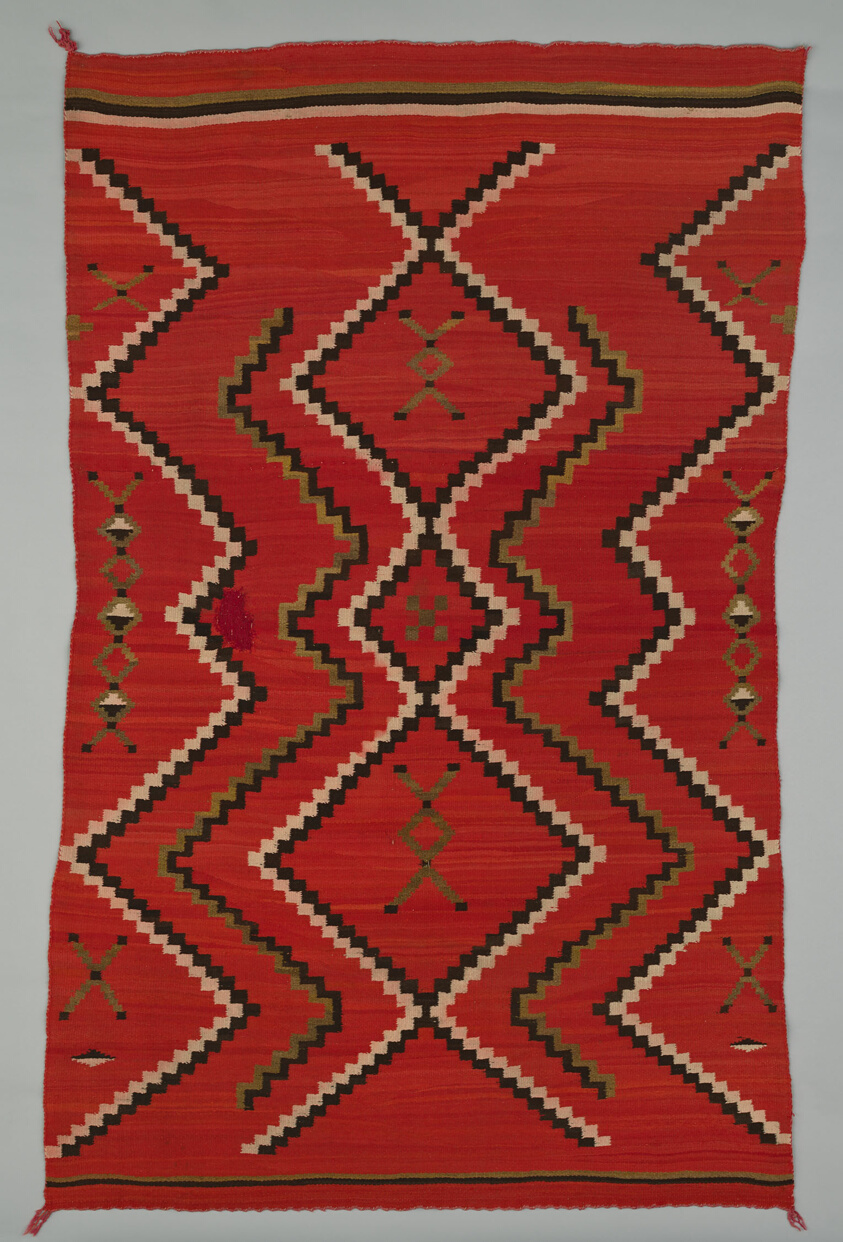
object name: Textile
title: Sarape with Terraced Zigzag Design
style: navajo, dine, Arts of the Americas, indigenous, north american, native american, native north american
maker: Navajo (Diné) (Arizona, New Mexico, and Utah, United States)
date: 1865–85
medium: Wool, plain weave and dovetail tapestry weave; twined warp ends and selvages; looped and knotted corner tassels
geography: New Mexico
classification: wearing blanket; wool; art of the americas; textile